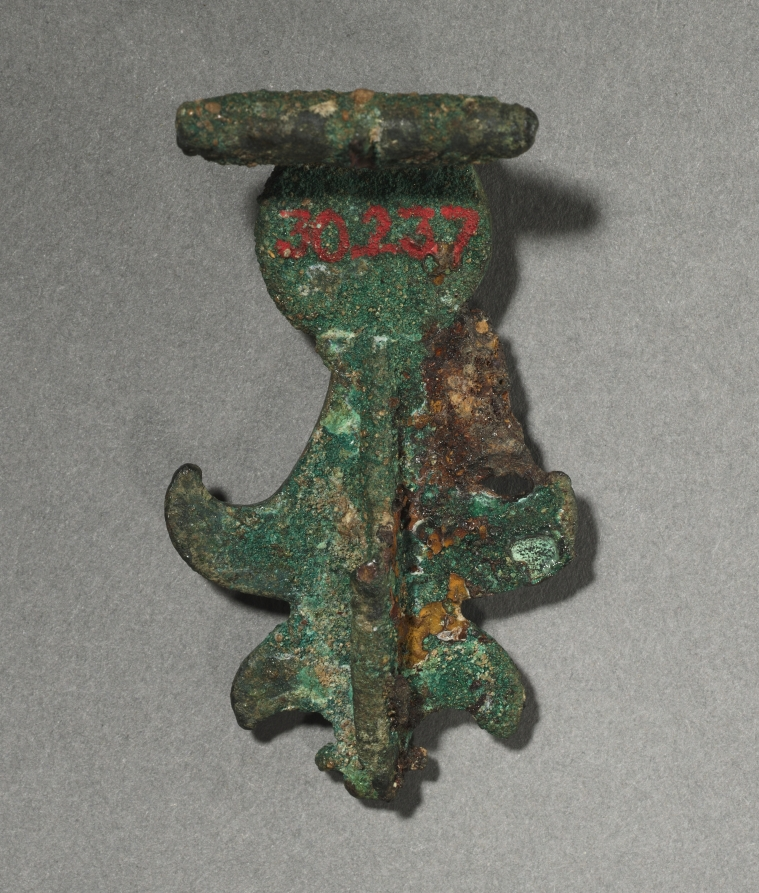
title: Ornamental Brooch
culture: Gallo-Roman or Romano-British, Migration period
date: c. 100–300 CE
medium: bronze and champlevé enamel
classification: Jewelry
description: These brooches functioned as garment clasps (much like the generally larger fibulae) and are distinctive for their decorative enamels. The art of enameling was highly popular among the conquered peoples who lived on the outskirts of the Roman empire, chiefly the Celts and the Gauls. Though the enameling technique was practiced by the Romans themselves on small objects, the brightly colored decoration readily appealed to "barbarian" taste. By the AD 200s, enameled brooches like these were being made in abundance by the native peoples of Britain and Gaul (modern France and Belgium).